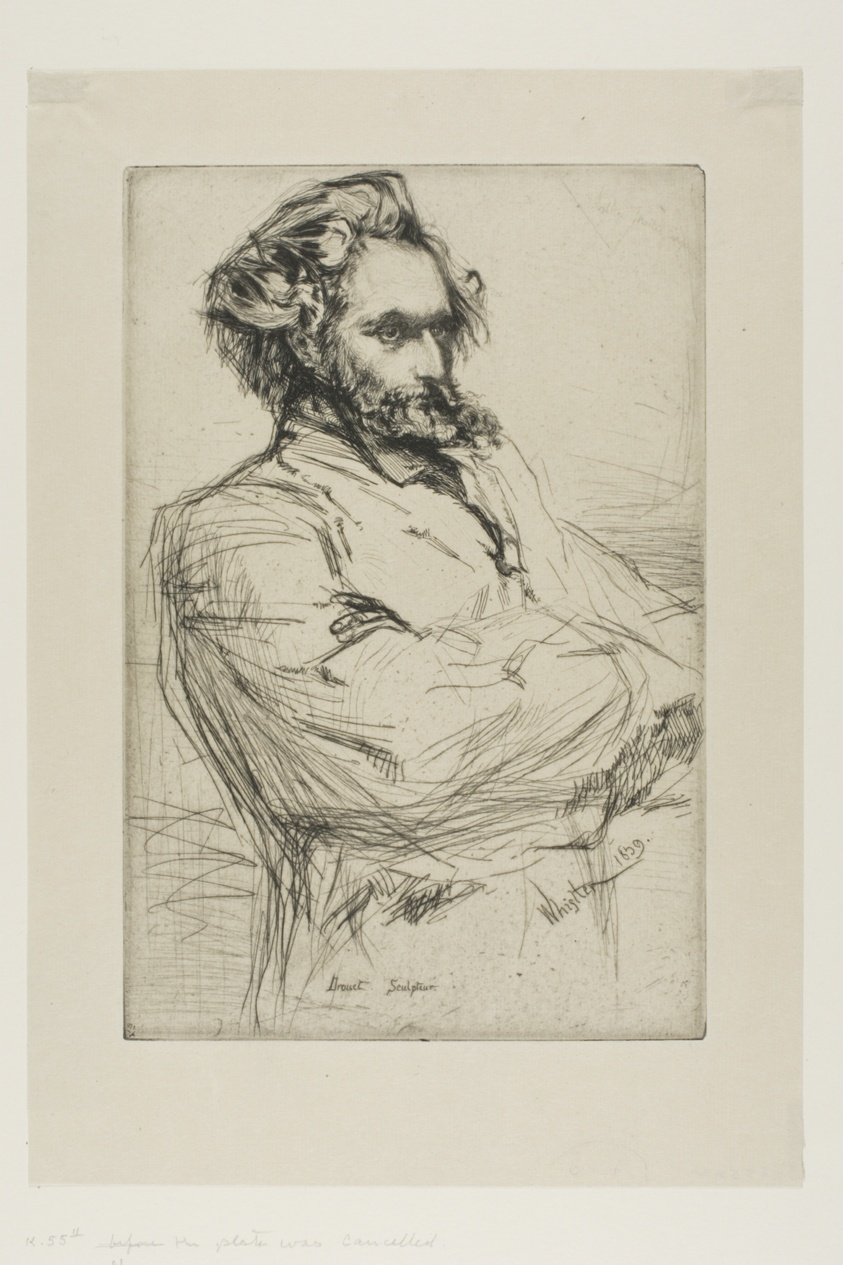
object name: Print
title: C. L. Drouet, Sculptor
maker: James McNeill Whistler (American, 1834-1903)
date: 1859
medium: Etching and drypoint in black ink on cream Japanese paper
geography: United States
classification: etching; drypoint; print; prints and drawing; paper